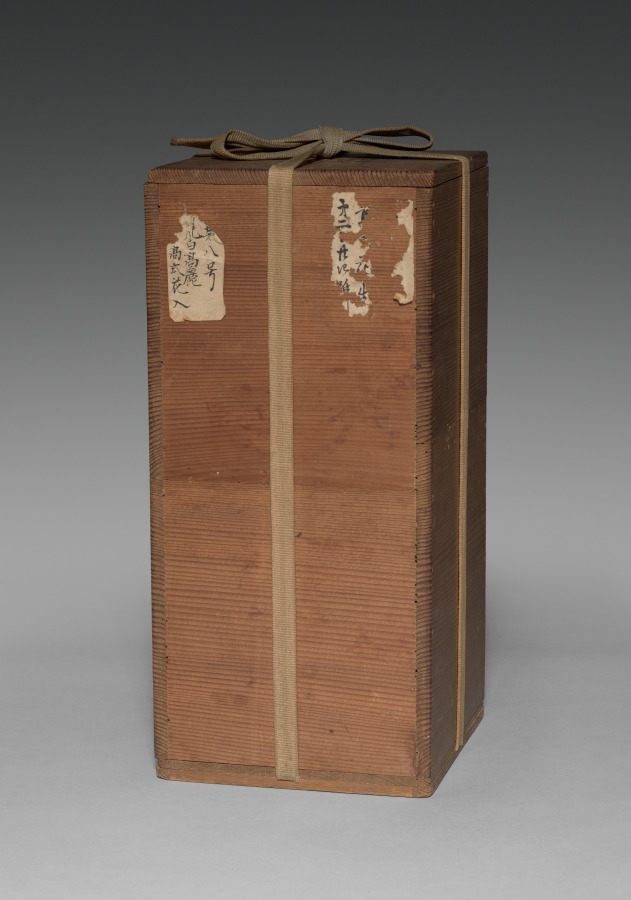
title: Gu-Shaped Flower Vase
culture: Japan, Meiji period (1868–1912)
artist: Seifū Yohei III (Japanese, 1851–1914)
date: 1893–97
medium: Glazed porcelain with molded and carved designs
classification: Ceramic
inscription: 大日本清風造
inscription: This gu-shaped vase has “cherry blossom glaze” (ōkayū), according to the inscription on its box.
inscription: A label affixed to the side of the box gives a sense of how previous owners conceived of the piece. Although the label is partially abraded, one can make out the character nezu 鼠, used in the names of numerous light pinks, from Naniwa pink (Osaka pink) to Miyako pink (Kyoto, or capital, pink). Also legible is the phrase hakugōrai, a broad term that can describe a shade of white associated with ceramics discovered in Korean tombs, but often applied to other ceramics of similar coloration, many from Chinese kilns, including Ding (J. Tei) ware of the Northern Song dynasty.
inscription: 清風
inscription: 帝室技芸員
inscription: 清風與平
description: Seifū Yohei III was the most prominent head of a ceramics studio in Kyoto that specialized in Chinese-style porcelains and especially items for use in sencha (煎茶), or the drinking of steeped-leaf tea with companions. Sencha was popular among the bunjin of Kyoto and Osaka, who often enjoyed it as part of their emulation of Chinese culture. While sencha was by design less formal than the Japanese tea ceremony, it still featured the display of treasured objects. Prized Chinese antiquities were generally unobtainable, so substitutes such as the Gu-Shaped Flower Vase were much in demand.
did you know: This gu-shaped vase has “cherry blossom glaze” (ōkayū), which Yohei III invented in 1890.